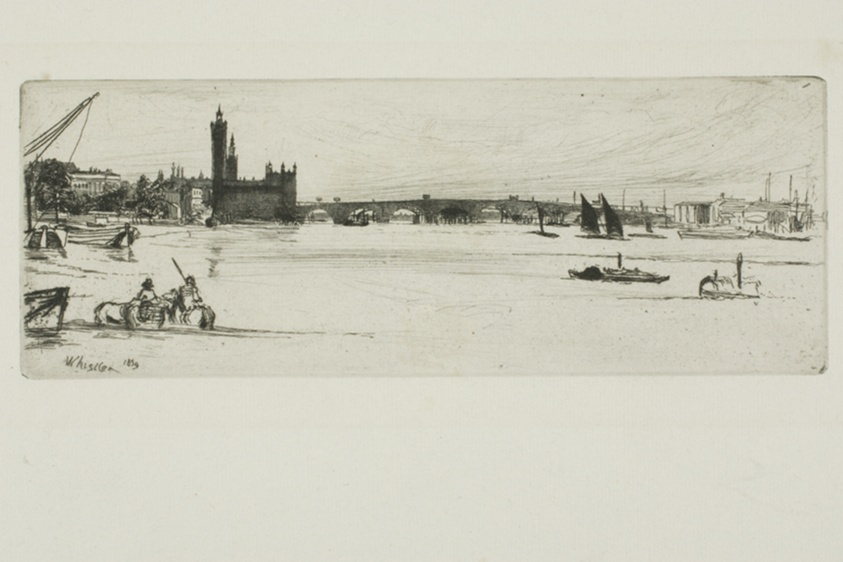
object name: Print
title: Old Westminster Bridge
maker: James McNeill Whistler (American, 1834-1903)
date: 1859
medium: Etching and drypoint in black ink on ivory laid paper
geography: United States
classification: etching; print; prints and drawing; paper; drypoint